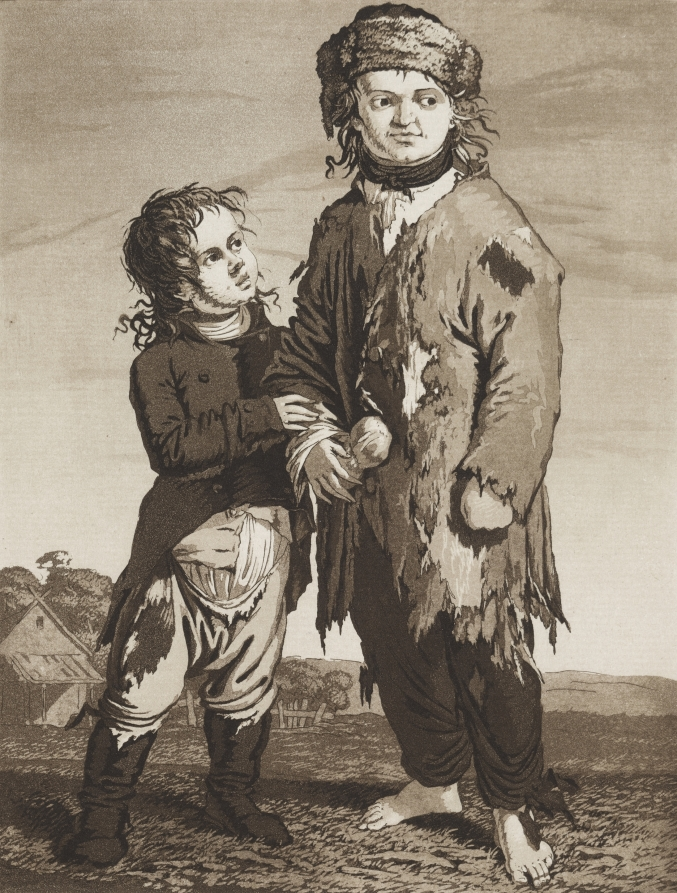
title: The Young Beggars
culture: Germany, late 18th-early 19th century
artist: Karl Ludwig Bernhard Buchhorn (German, 1770–1856)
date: c.1800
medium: aquatint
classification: Print